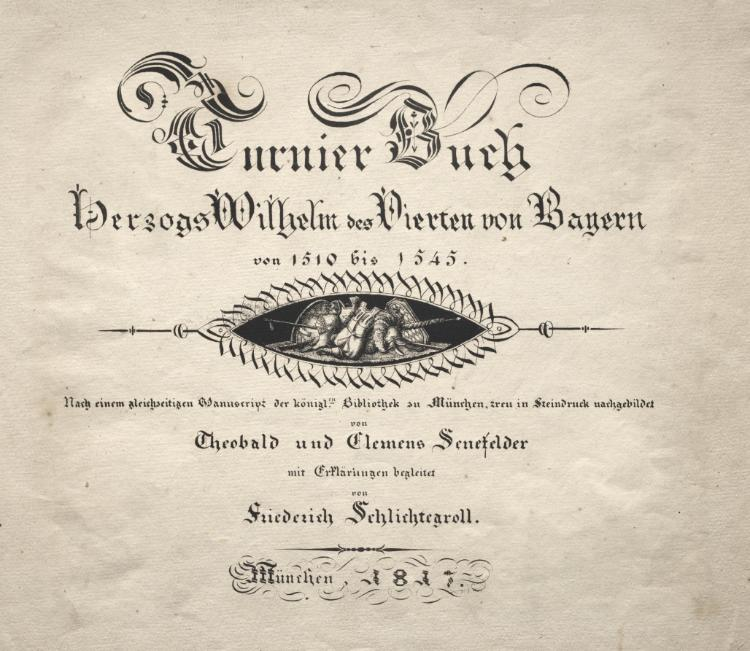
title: Book on Tournaments: Title Page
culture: Germany, 19th century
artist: Theobald Senefelder (German, 1777–1846)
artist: and Clemens Senefelder (German, 1778–1813)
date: 1817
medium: lithograph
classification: Print